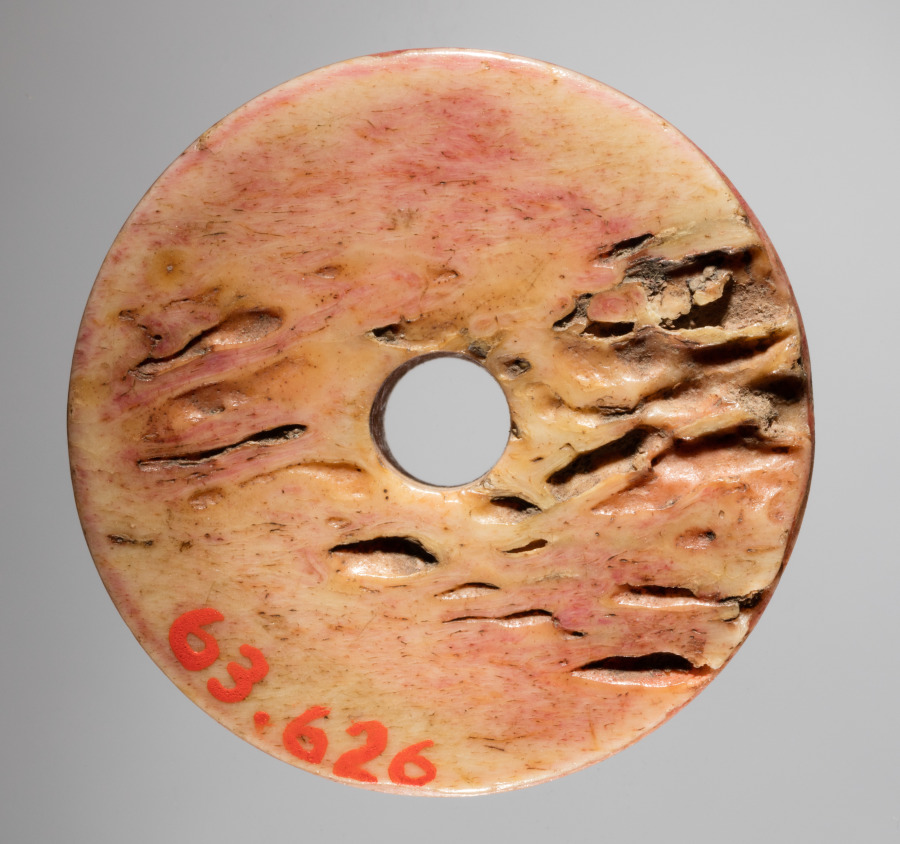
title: Spindle Whorl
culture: Iran, early Islamic period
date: 700s - 900s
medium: bone, incised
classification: Spindle Whorl